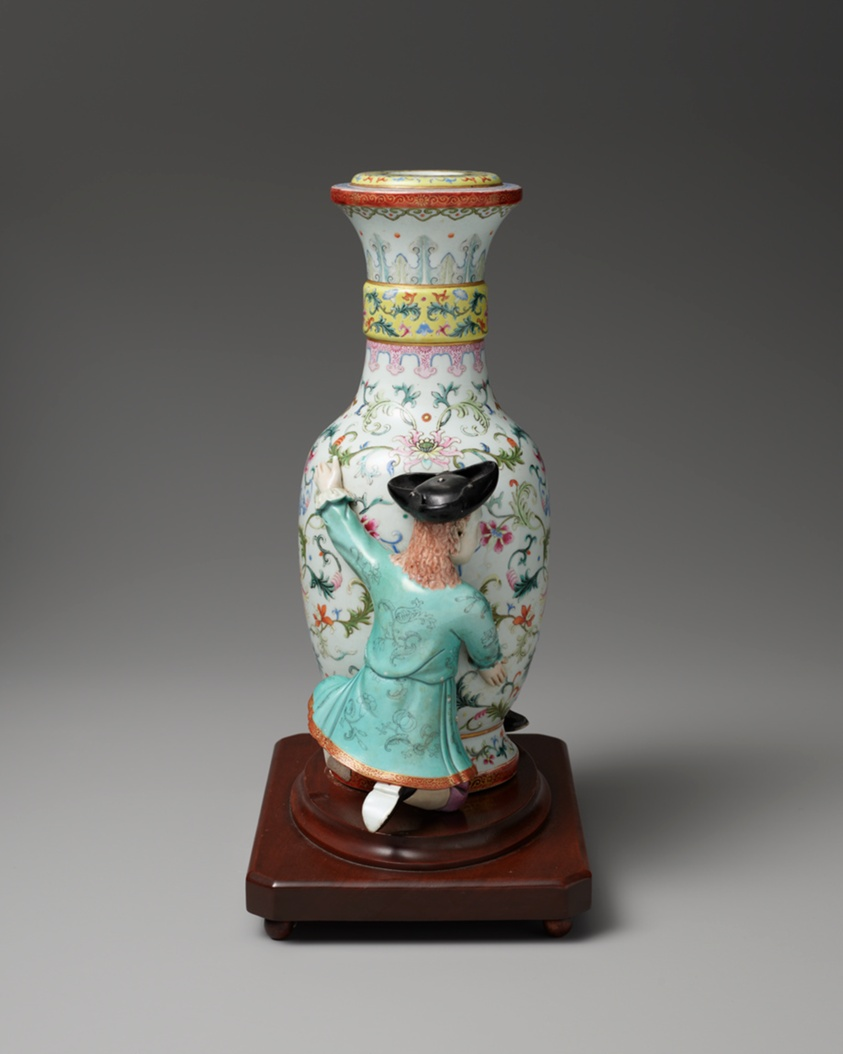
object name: Ceramics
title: Vase with European Figures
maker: China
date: second half of the 18th century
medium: Porcelain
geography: China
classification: vase; european decorative arts; porcelain